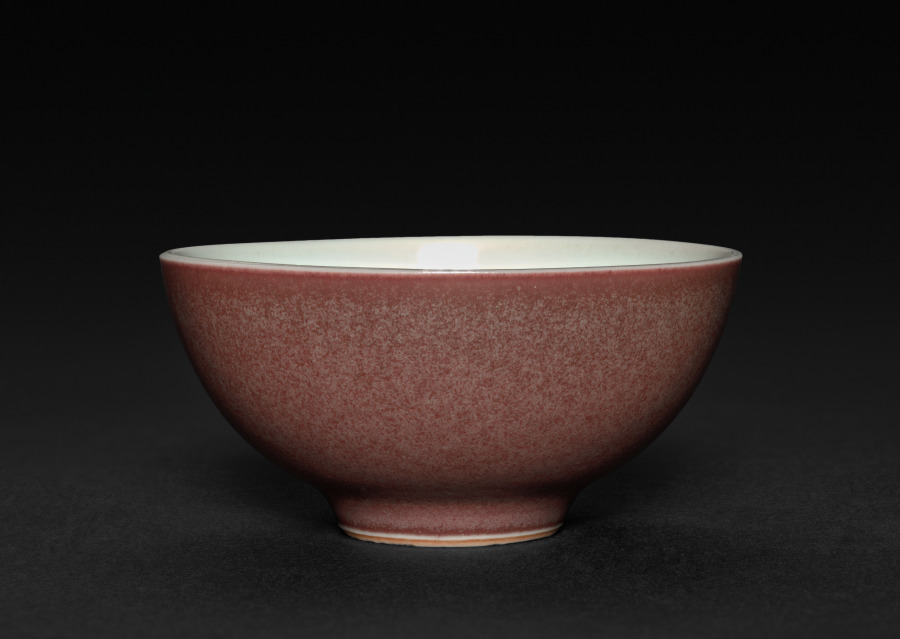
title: Cup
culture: China, Jiangxi province, Jingdezhen kilns, Qing dynasty (1644-1911)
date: 1700s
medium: porcelain with mottled blue glaze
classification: Ceramic